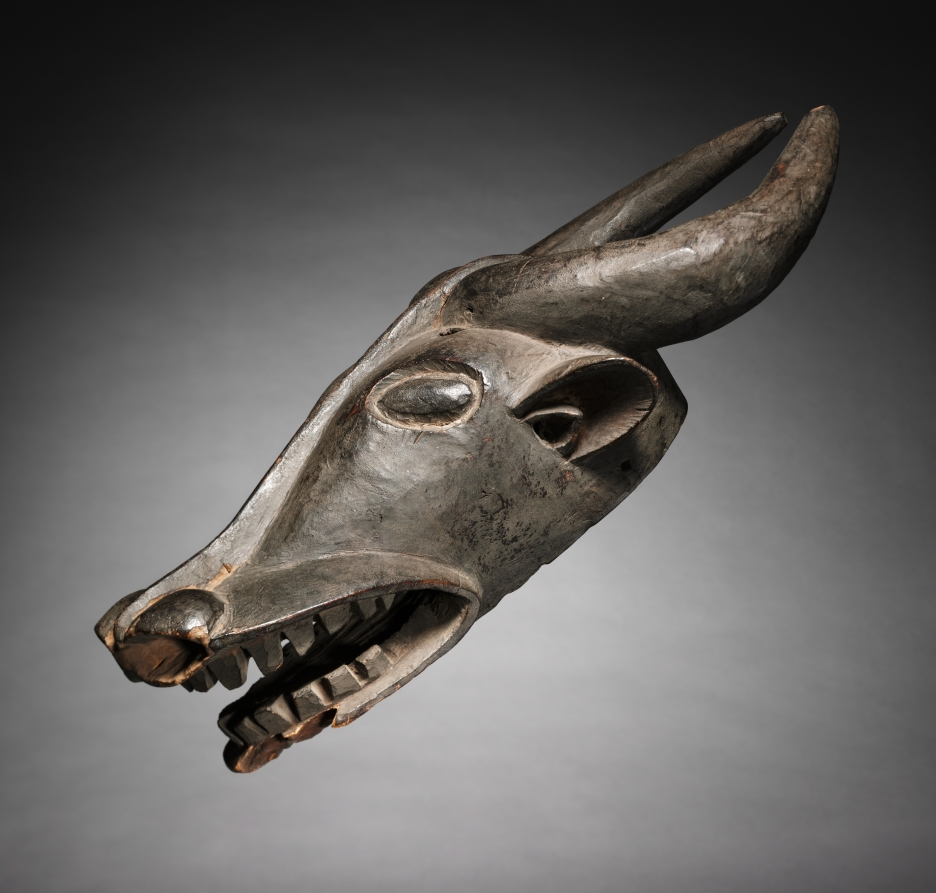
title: Headdress Mask: Buffalo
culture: Africa, Central Africa, Cameroon, Grassfields region, Bamileke-style maker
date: c. 1910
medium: Wood and colorant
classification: Mask